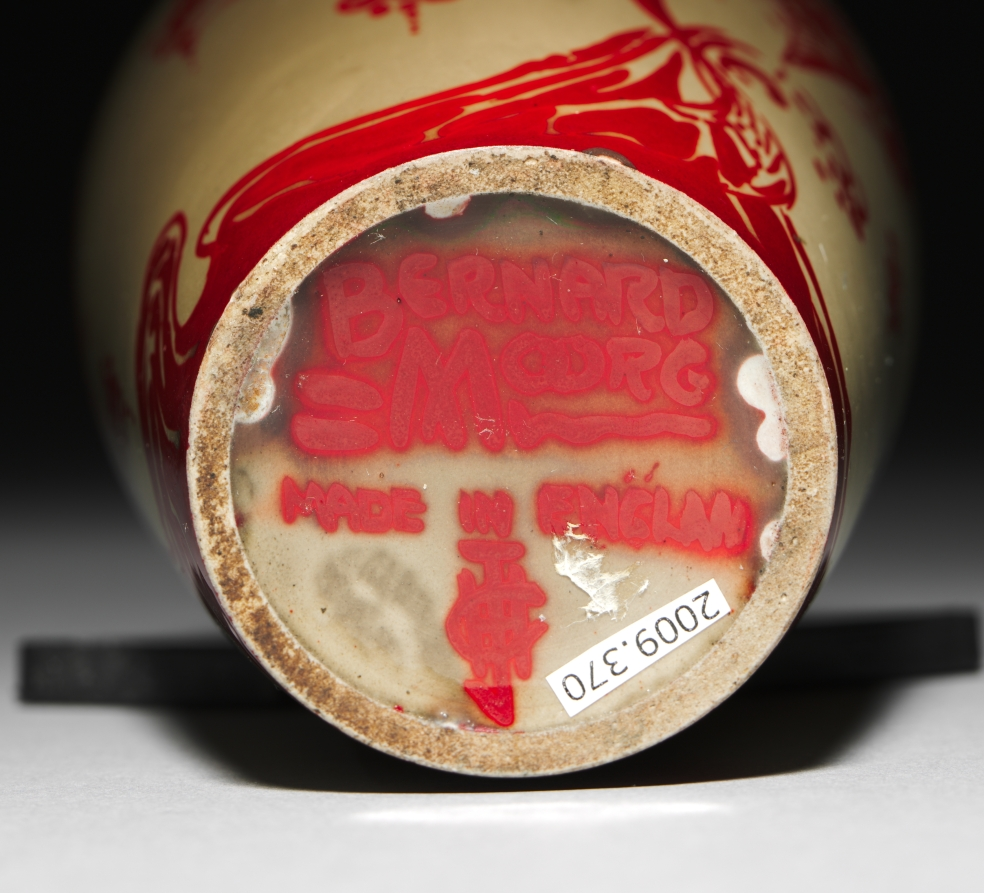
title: Vase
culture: England, 20th century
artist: Bernard Moore (British, 1850–1935)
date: c. 1900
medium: porcelain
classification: Ceramic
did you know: The designer Bernard Moore studied Asian and Islamic ceramics. He was especially interested in glazes like the vivid red one on this vase that resembles the color of oxblood.